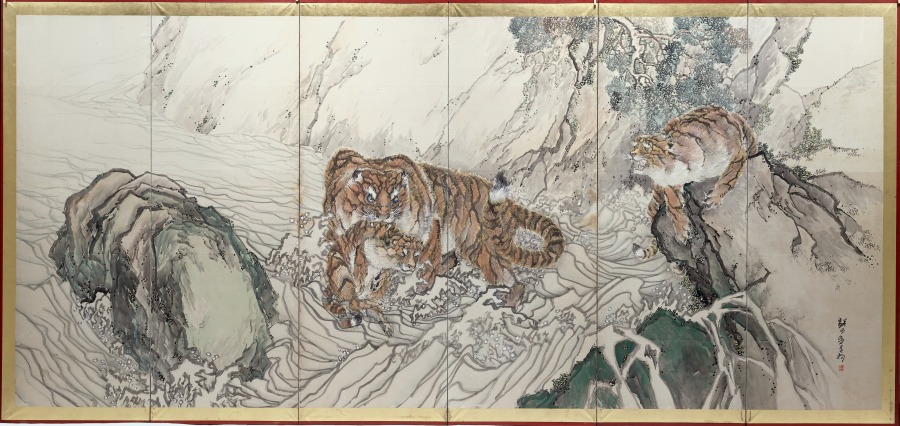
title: Tiger Family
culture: Japan, Edo period (1615–1868)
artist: Kishi Ganku (Japanese, 1749/56–1838)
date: early 1800s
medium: One of a pair of six-panel folding screens; ink and color on paper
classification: Painting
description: By the time this self-taught painter reached his thirties, his paintings were keenly sought after by Kyoto’s sophisticated patrons, including members of the imperial family. Judging from the surviving works, his supporters delighted in the colorful, auspicious imagery of Chinese historical figures, blossoming plum trees, cranes, peacocks, roosters, and especially tigers. Kishi Ganku was originally from the coastal town of Kanazawa, but relocated to Kyoto to work for the Arisugawa family. His work incorporates stylistic elements from the Kano school, the Maruyama school, and works by the Chinese artist Shen Nanping (1682–1760).